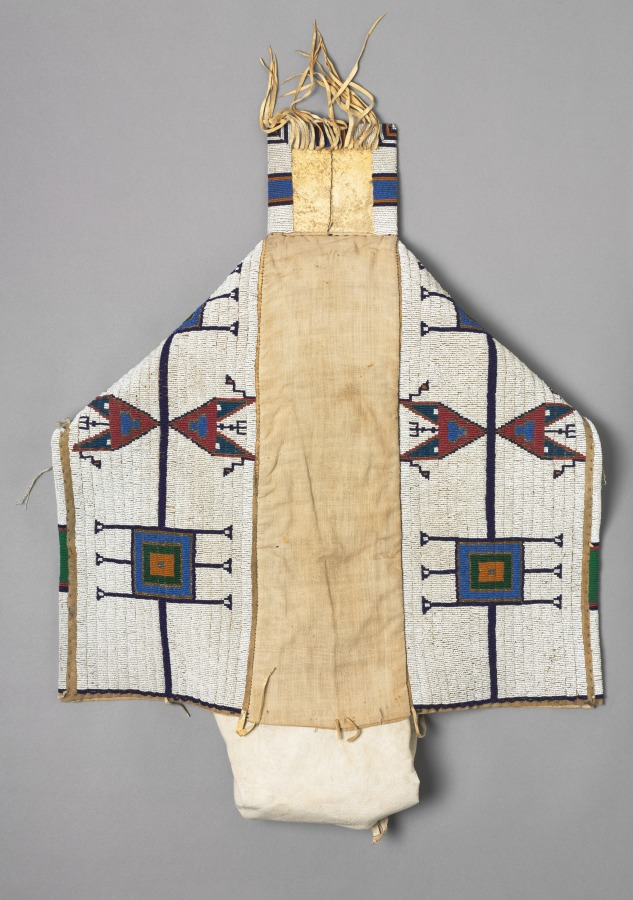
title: Cradle or Baby Carrier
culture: Native North America, Plains, Lakota (Sioux)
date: c. 1900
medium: Native-tanned hide, cotton cloth, glass beads, metal beads, brass bell, sinew thread, cotton thread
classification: Leather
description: Many Plains peoples hold lavishly quilled or beaded cradles in high esteem—they bestow spiritual benefits on the infant and prestige and honor on the family and the maker, usually a female relative. Indeed, today and in the past, creating such a cradle is often regarded as equal to counting coup, the ultimate act of male bravery in which a warrior touches an enemy with a stick known as a coup stick. This cradle was held in the arms; others have wooden frames that can be propped against a support, such as a sofa or a tree, to ease the baby’s socialization into the community.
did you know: In the past, young Plains children spent much of their time in cradles, which remain in occasional use today.